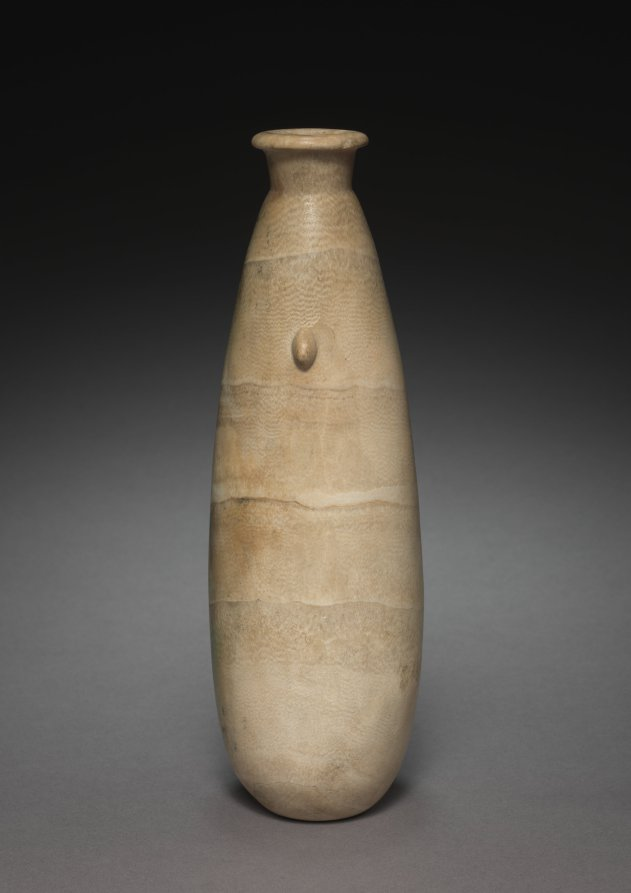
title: Alabastron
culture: Egypt, Late period (715–332 BCE), Dynasty 26 or later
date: 664–525 BCE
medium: travertine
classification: Vessels